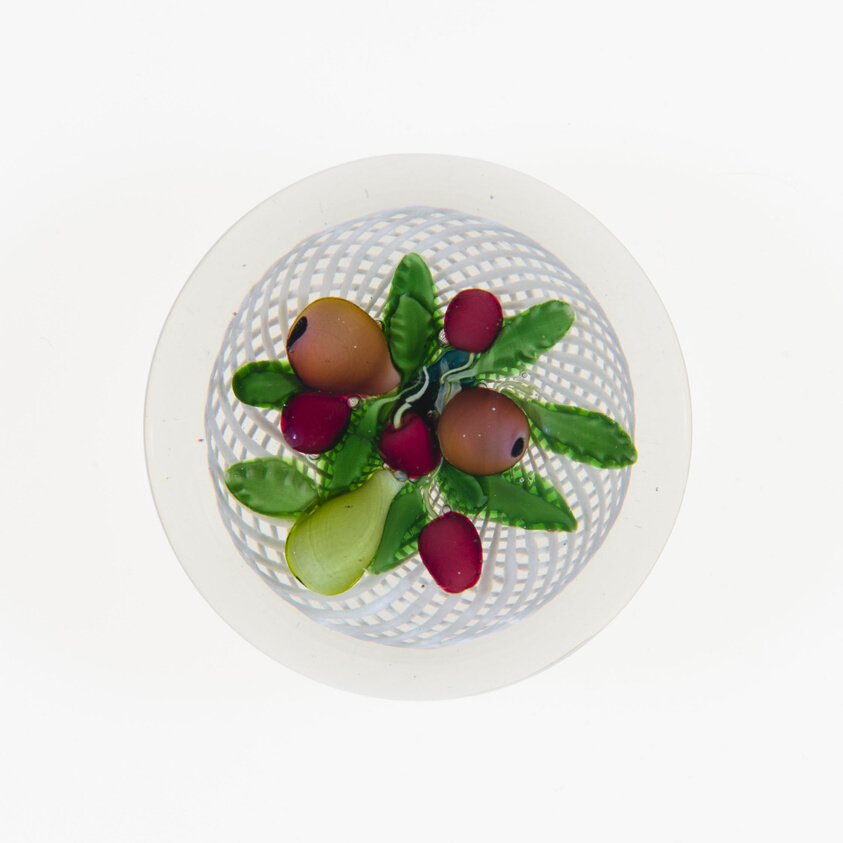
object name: Glass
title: Paperweight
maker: Saint-Louis Glassworks (Cristalleries de Saint-Louis); Lorraine, France, founded 1586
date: c. 1848–55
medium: Glass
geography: Saint-Louis-lès-Bitche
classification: paperweight; lampwork; european decorative arts; glass